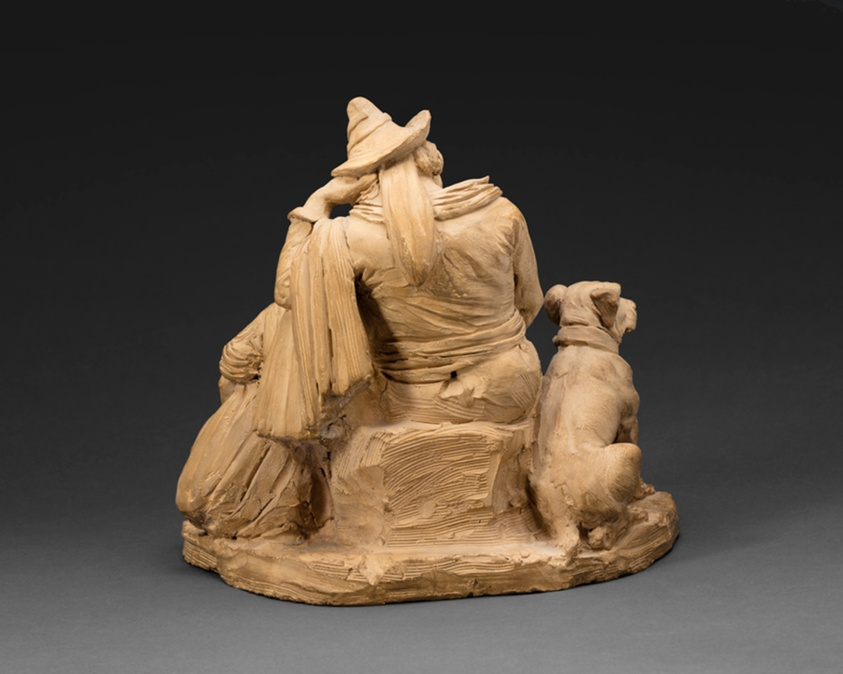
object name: Sculpture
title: Italian Peasants Resting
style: 19th century, nineteenth century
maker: Bartolomeo Pinelli (Italian, 1781–1835)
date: 1832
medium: Terracotta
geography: Italy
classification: statuette; sculpture; Italian; terracotta (sculpture)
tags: peasants, child, children, dog, families, man, sleep, woman